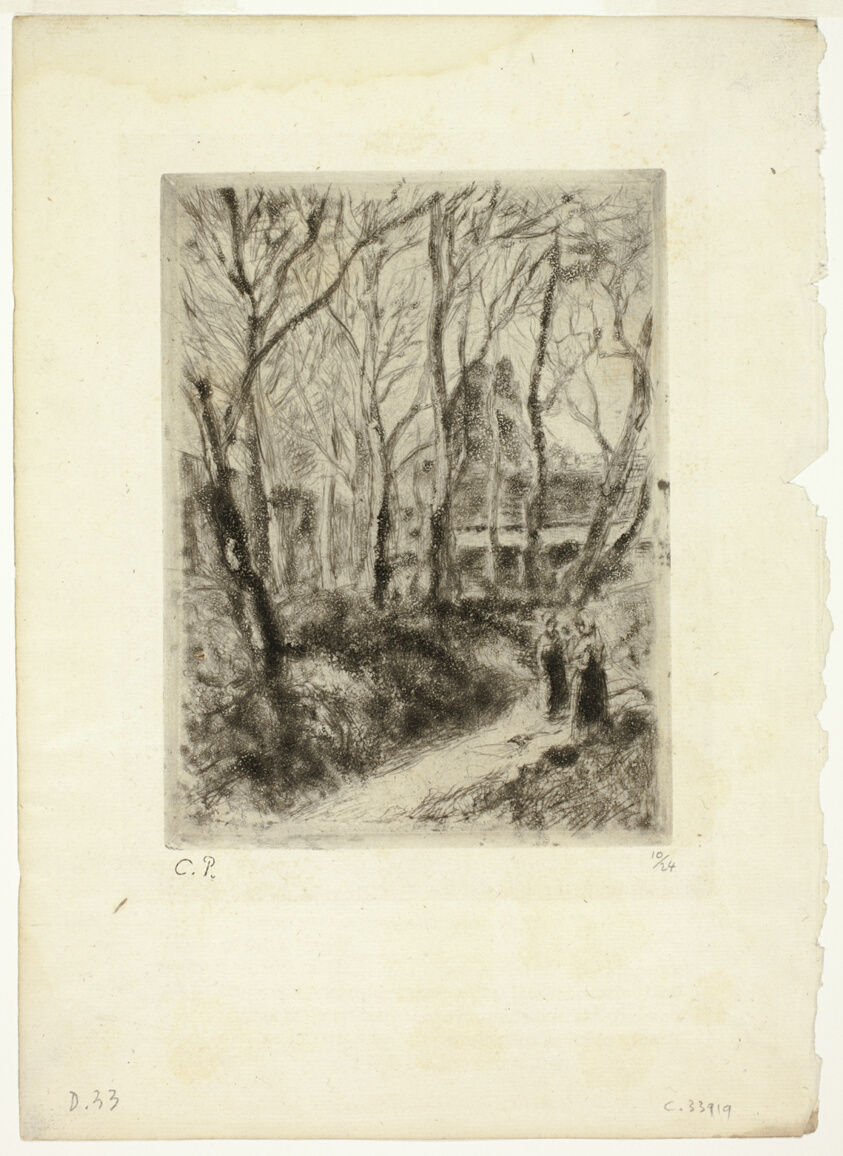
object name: Print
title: Path at Pontoise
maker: Camille Pissarro (French, 1830-1903)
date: 1882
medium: Aquatint and drypoint in black on cream laid paper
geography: France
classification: aquatint; print; prints and drawing